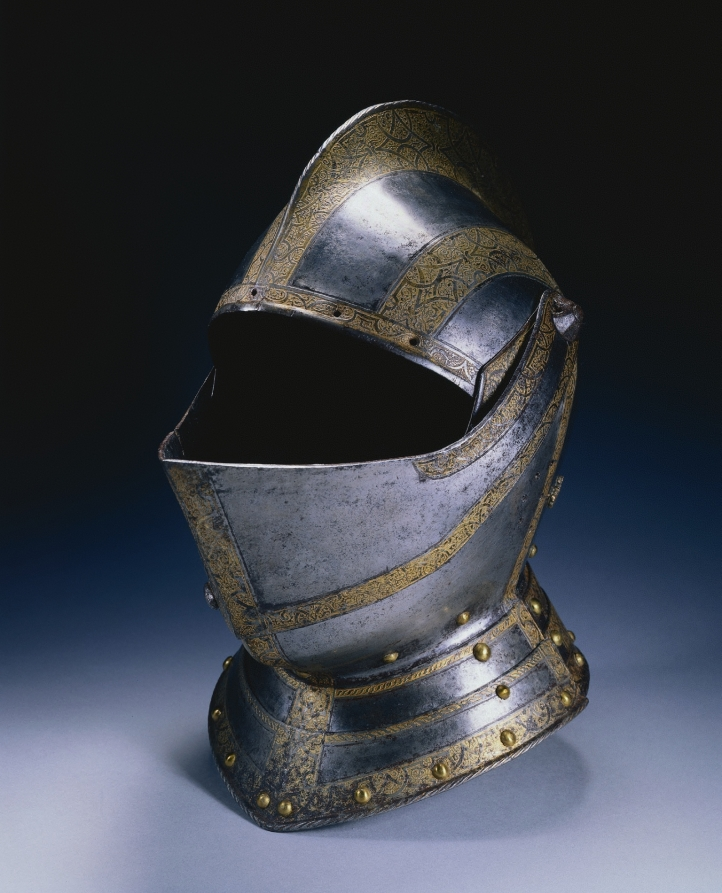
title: Close Helmet (from a Small Garniture, perhaps for Siegmund Friedrich, Freiherr von Herbertstein [d.1621])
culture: Germany, Augsburg (?), 16th century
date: c. 1580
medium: steel, etched and gilded, brass rivets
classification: Arms and Armor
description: This helmet appears to belong to a garniture for man and horse of which other elements survive in the Higgins Armory Museum, Worcester, Massachusetts, and the Philadelphia Museum of Art. The associated visor has been removed to better show the beautiful etched and gilded strapwork decoration.